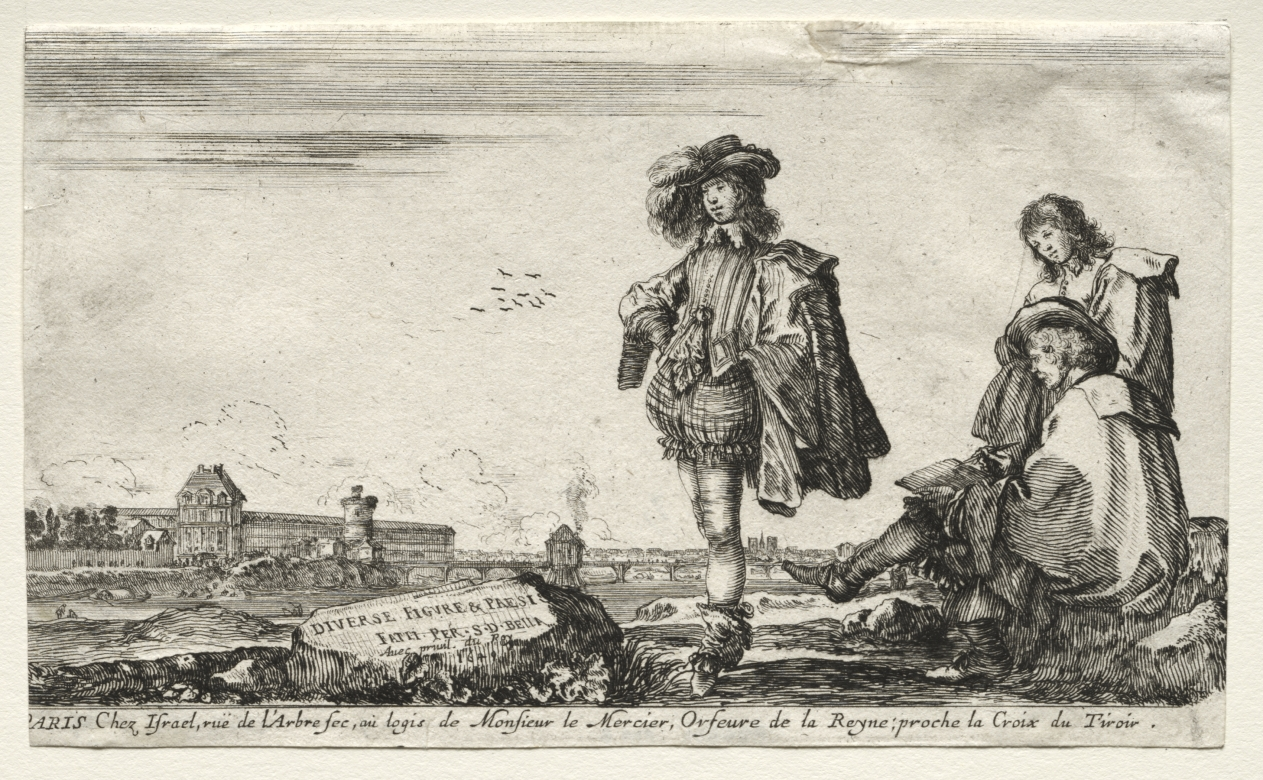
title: Various Figures and Landscapes: Title Page - Three Figures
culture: Italy, 17th century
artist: Stefano Della Bella (Italian, 1610–1664)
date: 1649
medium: etching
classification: Print